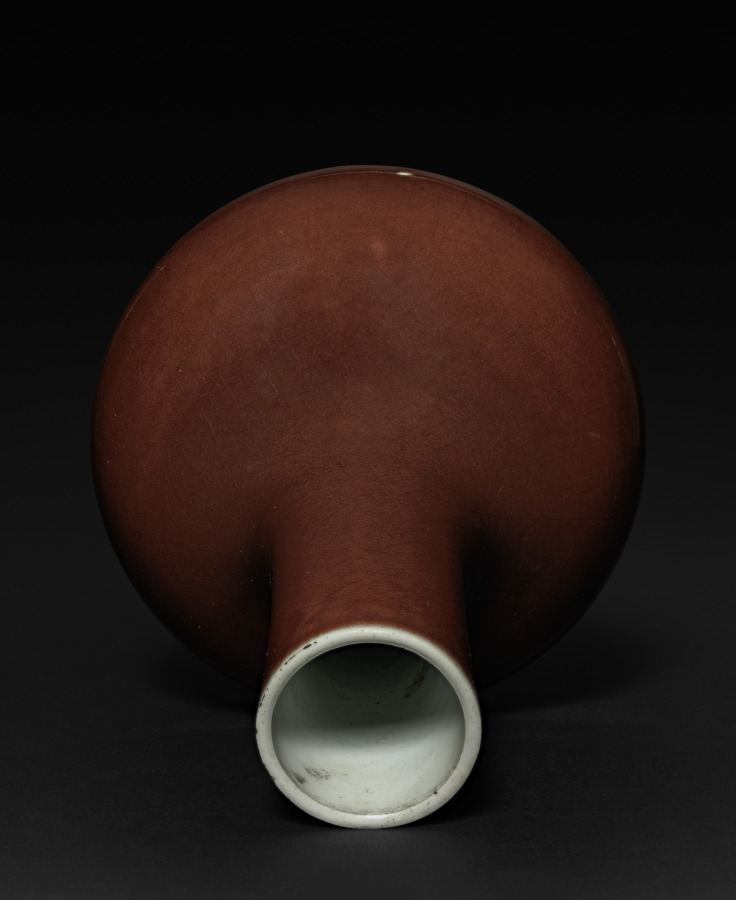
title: Bottle-shaped Vase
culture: China, Qing dynasty (1644–1911), Qianlong reign (1736–95)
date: 1736–95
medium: porcelain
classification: Ceramic